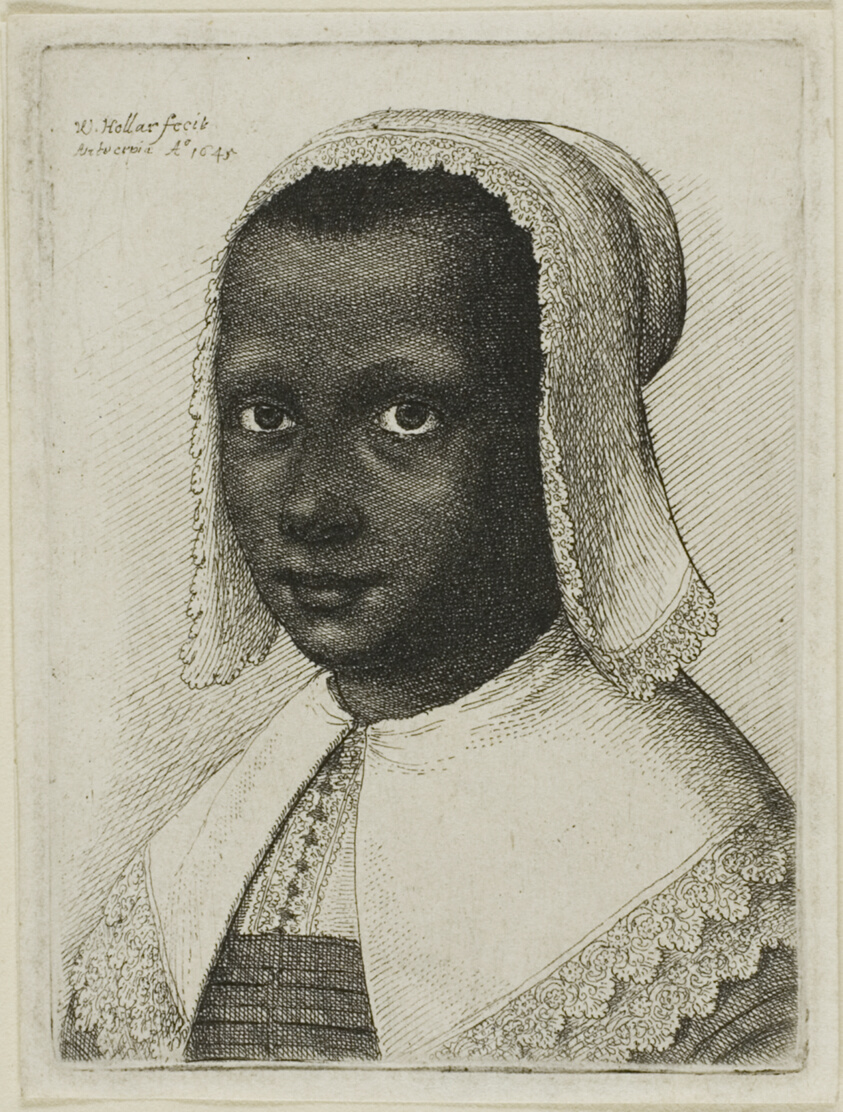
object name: Print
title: Head of a Black Woman with a Lace Kerchief Hat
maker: Wenceslaus Hollar (Bohemian, 1607-1677)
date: 1645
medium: Etching on ivory laid paper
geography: Bohemia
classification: etching; print; prints and drawing